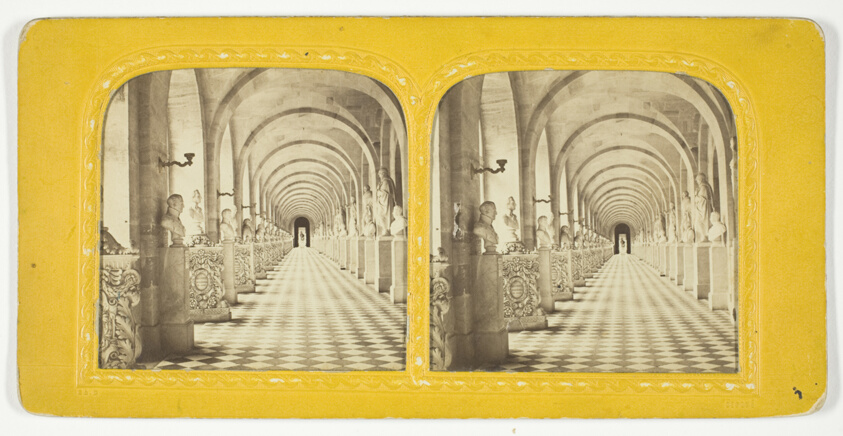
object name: Photograph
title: Palais de Versailles Galerie des Sculptures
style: 19th century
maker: Artist unknown; French, active late 19th century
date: 1875/99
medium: Albumen print, stereo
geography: France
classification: photography; photograph